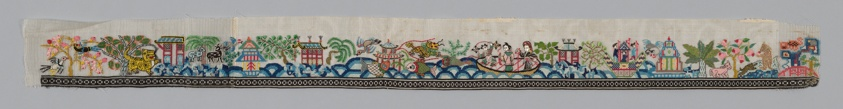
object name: Textile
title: Border (from Woman's Garment)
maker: China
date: 1875/1900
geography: China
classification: textile; needlework - costume; needlework (visual works)